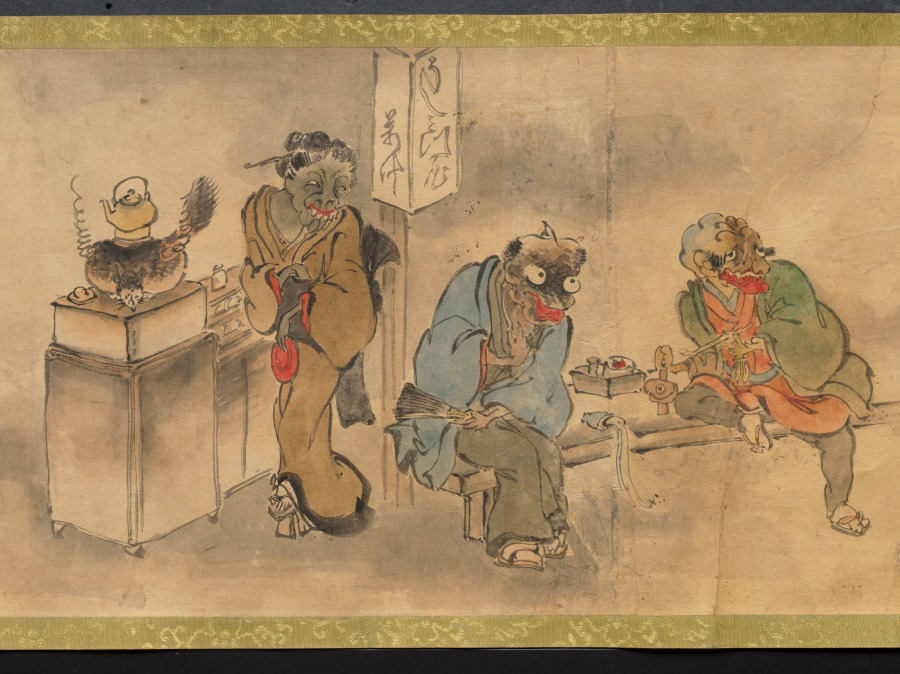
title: An Illustrated Marriage of Apparitions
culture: Japan, Edo period (1615–1868)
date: mid-1800s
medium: handscroll; ink and color on paper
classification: Painting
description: The matchmaking, engagement, wedding, and birth of the first child of two apparitions, or bakemono, literally "things that change," are illustrated in this whimsical, humorous handscroll. Japanese folklore abounds with such strange creatures, most famously represented in handscrolls featuring a procession of 100 supernatural monsters. Aside from a textual preface and cartouches indicating the content of the scenes, the tale is told visually. The artist and whereabouts of the original handscroll are unknown, but a number of other 19th-century copies by amateur painters exist in Japanese collections, attesting to its broad appeal.